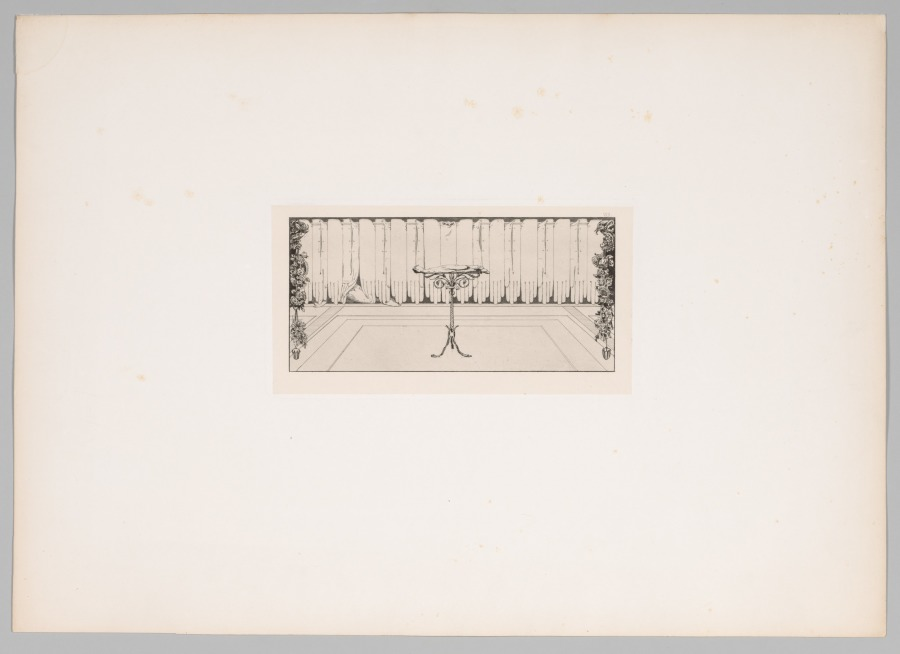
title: A Glove: Repose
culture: Germany, 19th century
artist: Max Klinger (German, 1857–1920)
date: 1880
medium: etching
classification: Print